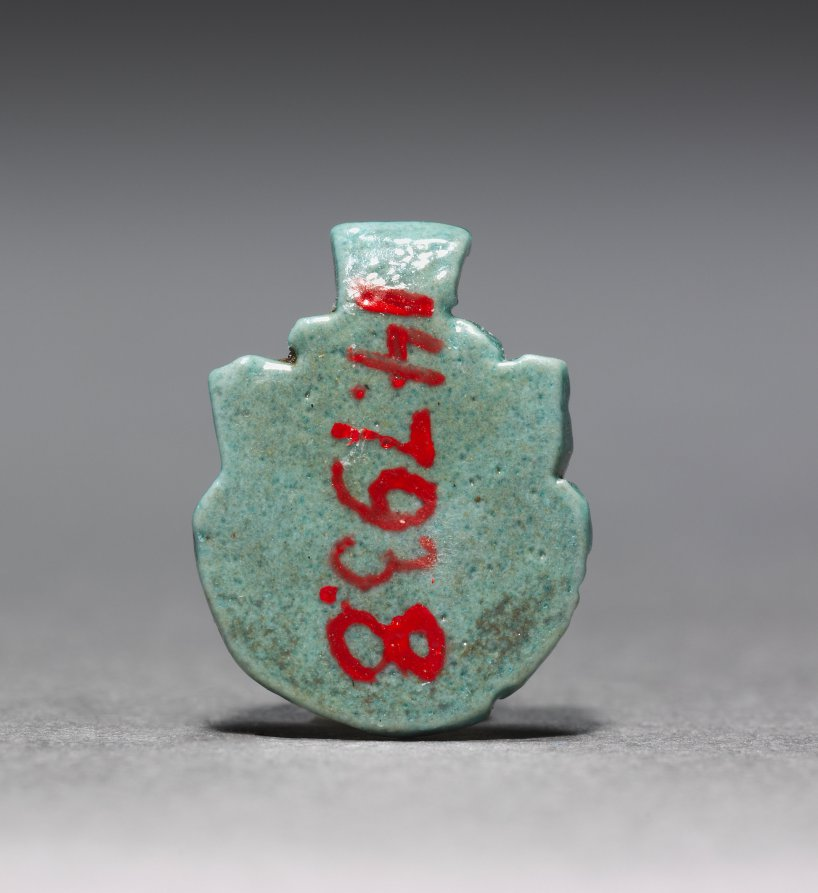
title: Amulet of a Palmette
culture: Egypt, New Kingdom (1540–1069 BCE), Dynasty 18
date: 1540–1296 BCE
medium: pale blue faience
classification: Amulets